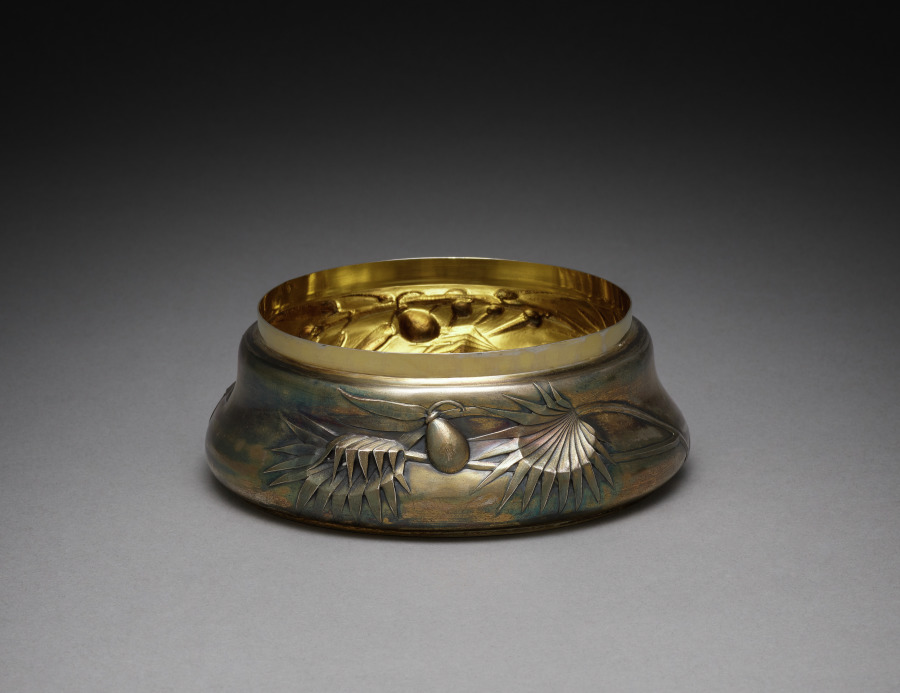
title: Box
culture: Sweden, 19th century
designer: Ingeborg Plockross-Iminger (Danish, 1872–1962)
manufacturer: Bing & Grøndahl (Danish, est. 1853)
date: c. 1850–1900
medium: porcelain, silver-gilt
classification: Sculpture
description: This figure featuring three monkeys was designed by the Danish ceramicist Ingeborg Plockross-Iminger. The figure is displayed with a French silver mount that references Japonisme and Art Nouveau styles that were popular at the end of the 1800s and experienced a resurgence in the 1920s because of increased importation of Japanese goods to the West.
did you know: This ceramic figure usually stands alone, without a silver mounting.